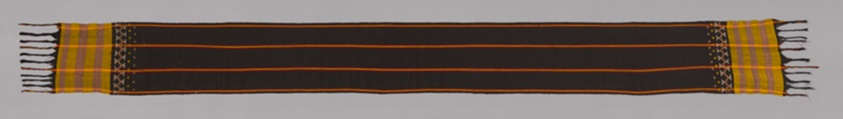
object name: Costume and Accessories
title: Scarf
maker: Baguio, Philippines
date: reproduction of 16th century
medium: Black cotton, with yellow and red stripes; borders in herringbone weave in yellow and rose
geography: Philippines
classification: textile; weaving; costume